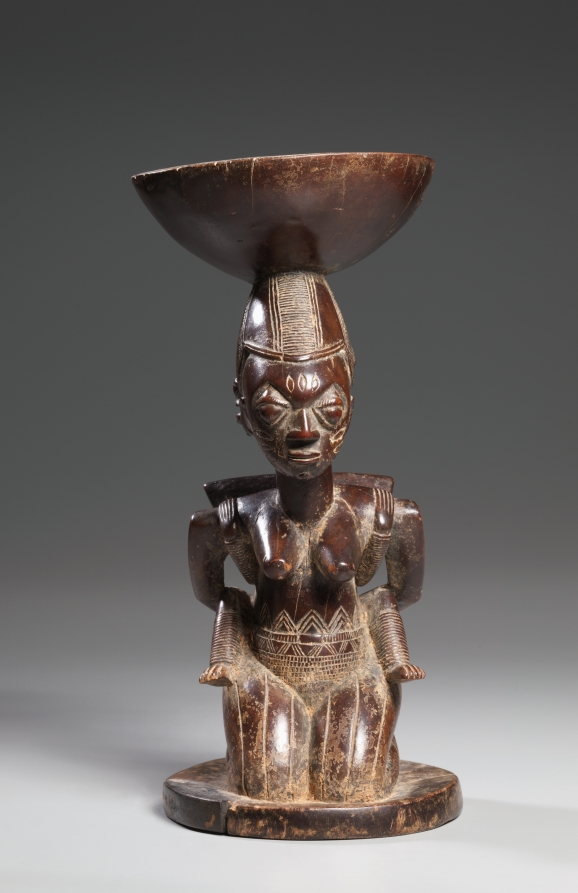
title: Ifá divination vessel (àgéré Ifá)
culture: Africa, West Africa, Nigeria, possibly Èkìtì State, Yorùbá-style carver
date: mid- late 1800s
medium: Wood and colorant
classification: Sculpture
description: The mother figure of this vessel from the Southern Ekiti region represents a devotee who kneels before the gods. The vessel once held the 16 sacred palm nuts essential to divination rituals. The object was used by a priest as a medium through which to communicate with the god of fate, Orunmila, in order to gain insight into an individual’s destiny or to understand the cause of misfortune.